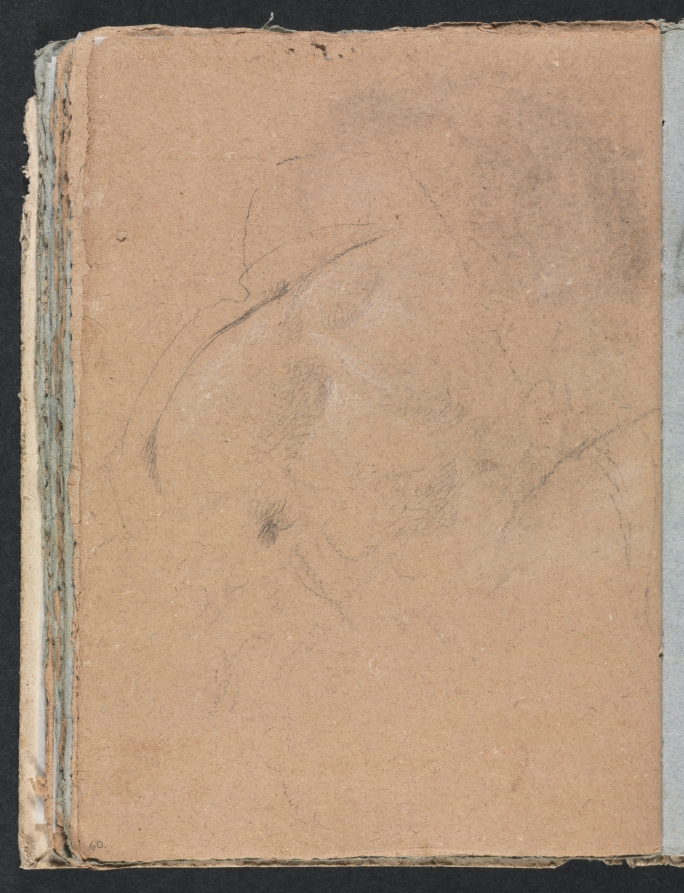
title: Verona Sketchbook:Indecipherable form (page 60)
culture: Italy, 18th century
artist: Francesco Lorenzi (Italian, 1723–1787)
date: 1760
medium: black chalk with white heightening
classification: Bound Volume